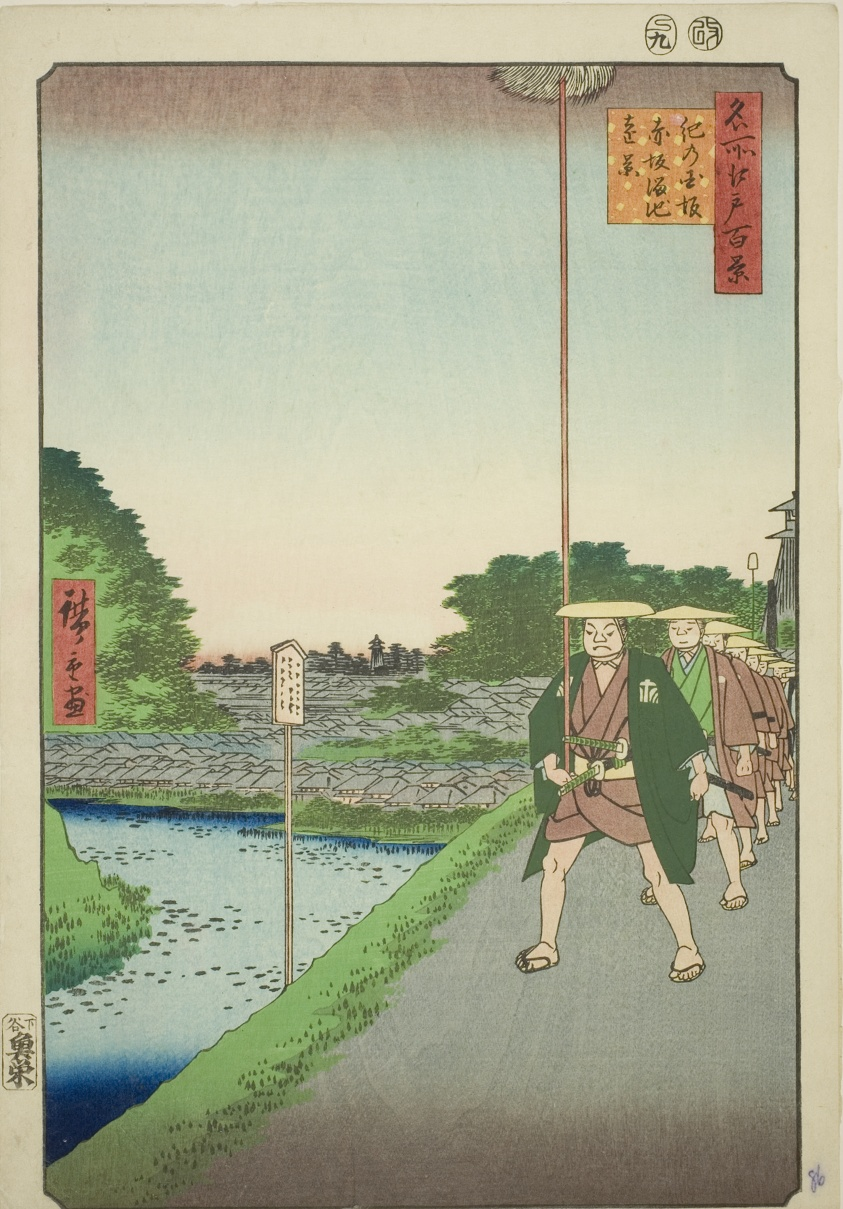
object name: Print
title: Distant View of Akasaka Reservoir from Kinokuni Slope (Kinokunizaka Akasaka Tameike enkei), from the series "One Hundred Famous Views of Edo (Meisho Edo hyakkei)"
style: Japanese (culture or style)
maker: Utagawa Hiroshige 歌川 広重; Japanese, 1797-1858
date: 1857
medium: Color woodblock print; oban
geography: Japan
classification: woodblock print; print; asian art